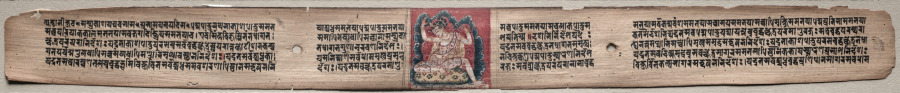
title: Samantabhadra spinning clouds of things, folio 22 (recto) from a Gandavyuha-sutra (Scripture of the Supreme Array)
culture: Nepal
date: 1000–1100s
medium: gum tempera and ink on palm leaf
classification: Painting